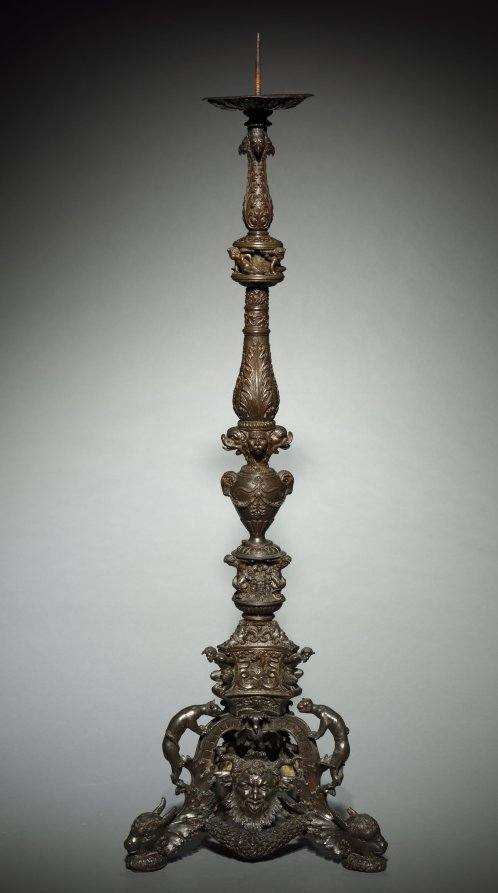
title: Paschal Candlestick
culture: Northern Italy, possibly Padua, 16th century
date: c. 1525–1550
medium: bronze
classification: Sculpture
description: In Roman Catholic practice, a large candlestick holds the Paschal Candle, blessed and lit for the first time on Easter eve, then used on significant occasions throughout the year. Despite its religious function, the decorations here are entirely secular-ranging from panthers and bound satyrs to the heads of raptors and goats. These elements derive from ancient Roman sculpture and were especially popular among intellectuals in northern Italy, who were actively exploring connections among pagan traditions, ancient philosophy, and Christianity.